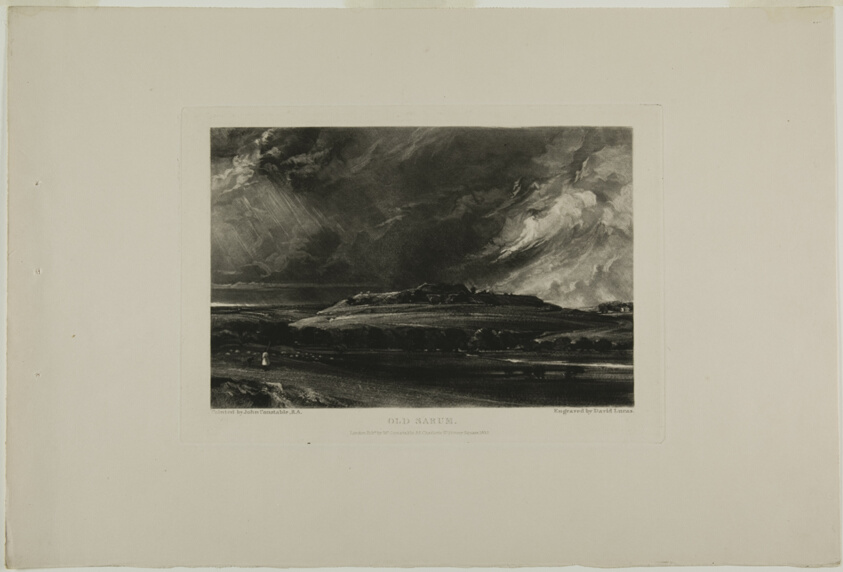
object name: Print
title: Old Sarum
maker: David Lucas (English, 1802-1881); after John Constable (English, 1776-1837)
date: 1832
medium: Mezzotint in black ink on heavy ivory wove paper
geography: England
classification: mezzotint; print; prints and drawing